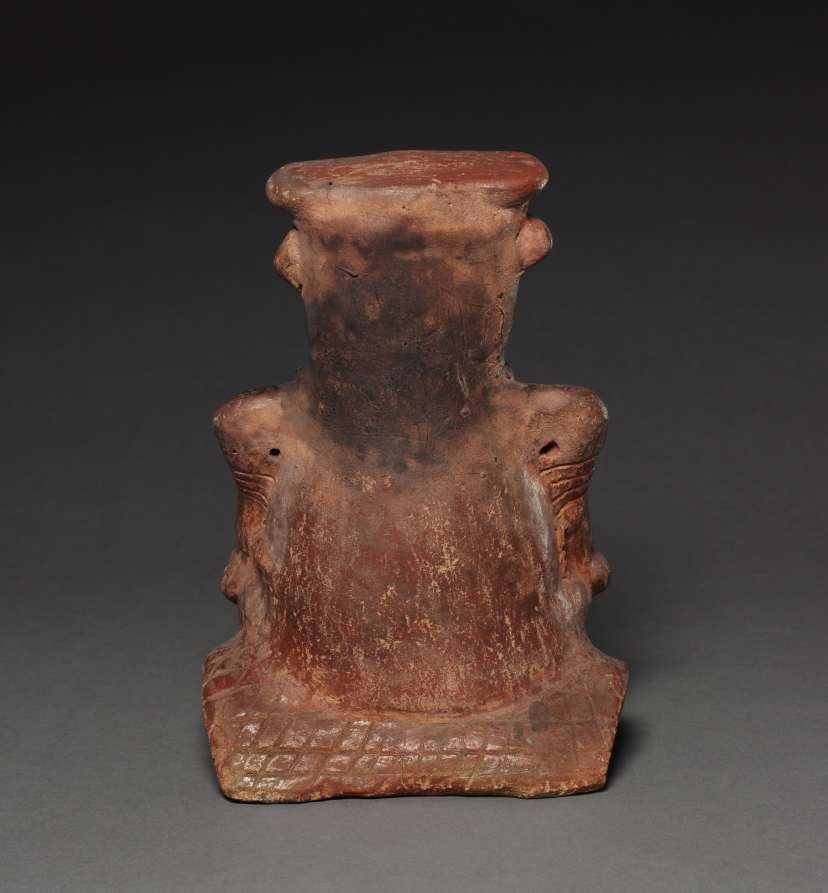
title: Seated Figure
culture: Colombia, 19th-20th century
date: before 1921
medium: red ware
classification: Ceramic